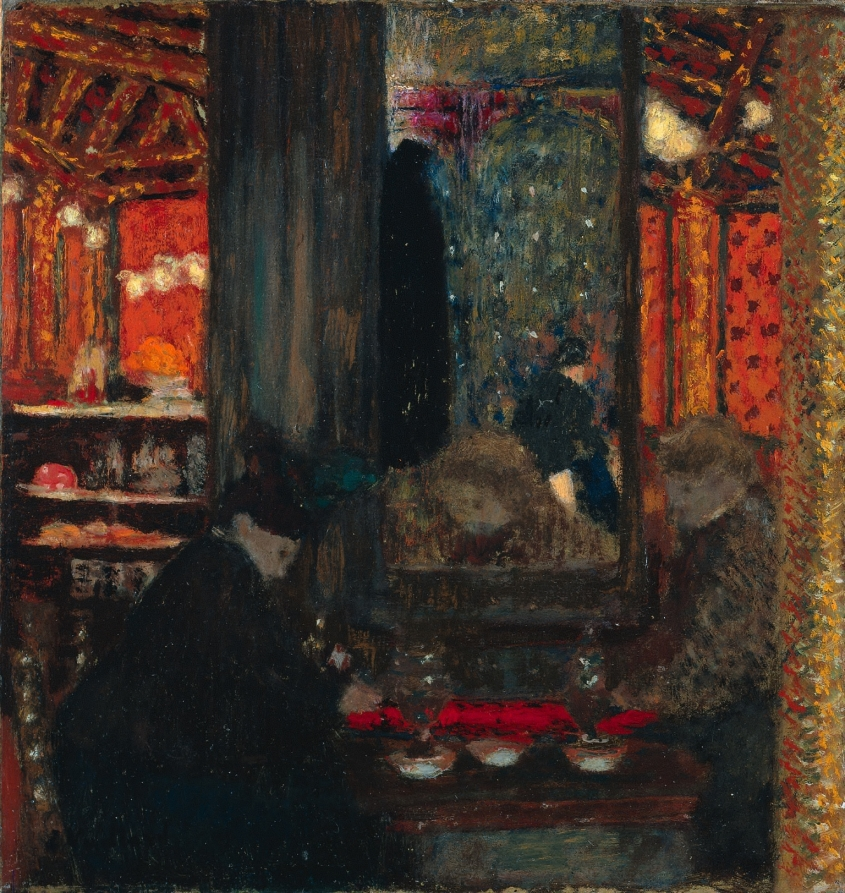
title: At the Café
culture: France, 19th century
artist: Édouard Vuillard (French, 1868–1940)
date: c. 1897–99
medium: oil on board, laid on cradled panel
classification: Painting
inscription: Signed lower left: E Vuillard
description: This scene of two women in a Parisian café has a hushed atmosphere that is heightened by the warm palette and glow of gaslight. Édouard Vuillard and Félix Vallotton were close friends and painted together in the 1890s, but Vuillard’s quiet café and Vallotton’s riotous Bistro (2020.114) could not be more different in mood.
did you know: Vuillard once said, “I don’t do portraits. I paint people in their surroundings.”